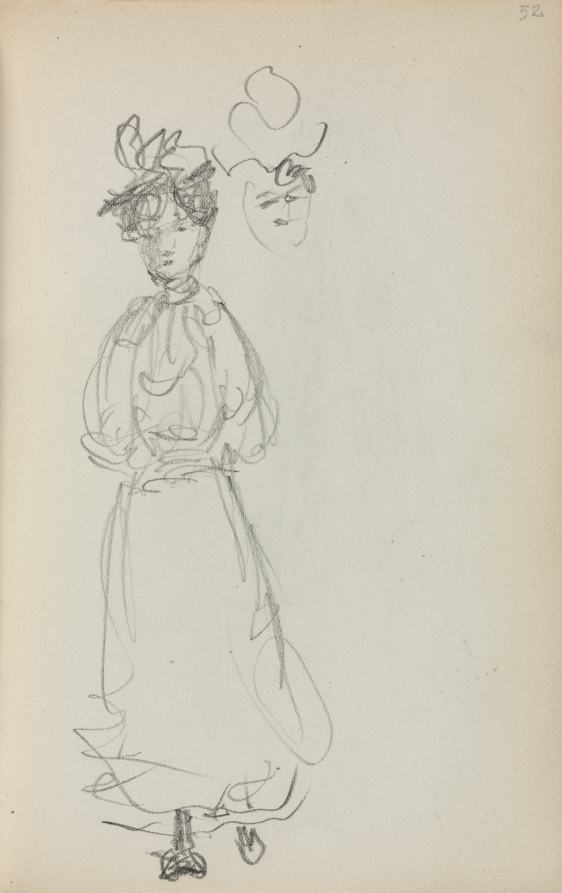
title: Italian Sketchbook: Standing Woman, face (page 52)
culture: America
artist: Maurice Prendergast (American, born Newfoundland [now Canada], 1858–1924)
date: 1898–1899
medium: pencil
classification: Bound Volume